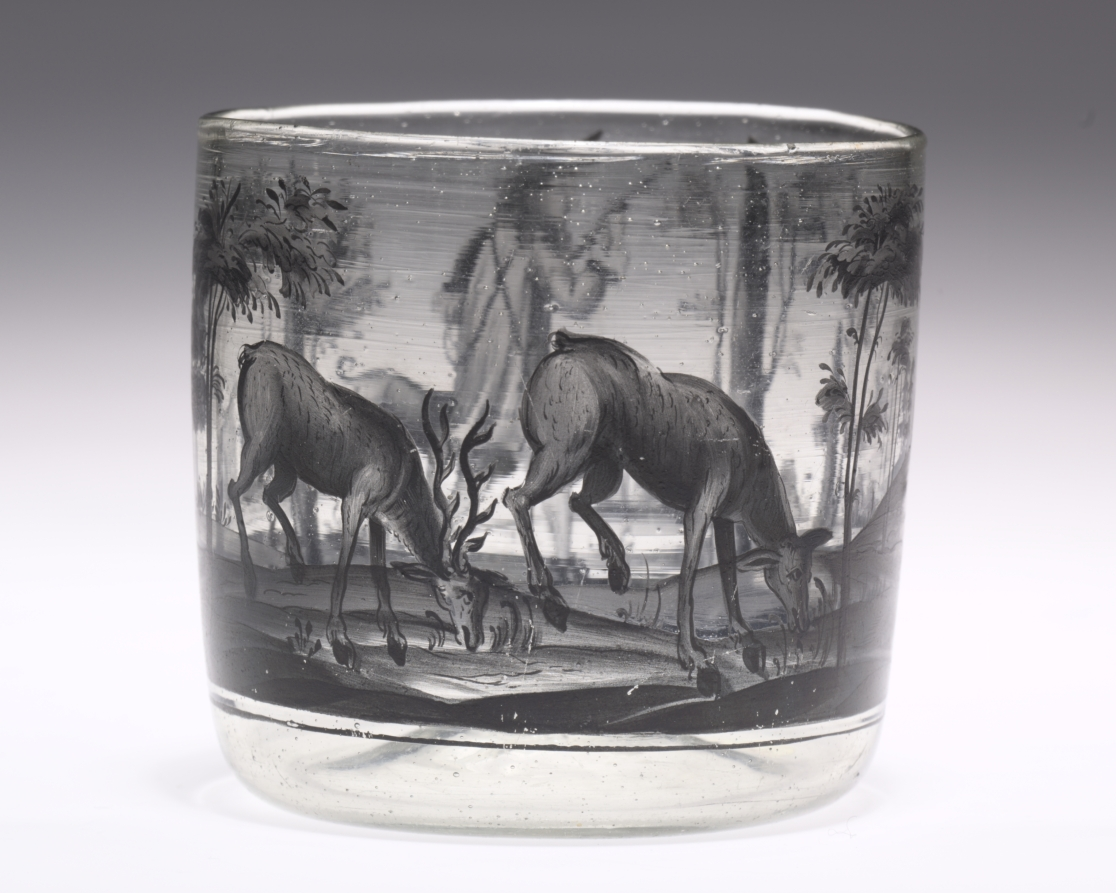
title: Bowl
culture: Germany, mid-17th century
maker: attributed to Johann Schaper (German, 1635–1670)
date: c. 1665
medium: Wheel engraved glass; enamel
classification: Glass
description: Johann Schaper (1621-1670) was a German painter of stained glass, mainly working in Nuremberg and Regensberg, who later turned to decorating glass and ceramics from his home, which was typical of artisans in the 17th century (hausmaler). His style was mainly a linear one in the manner of engravings, and often he worked in black (schwarzlot) or dark colors. Schaper was so influential that other artisans tried to copy his technique, in which he scratched out details with a needle, with varying degrees of success.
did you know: The fine details of the decoration were achieved by scratching away the enamel with a needle.